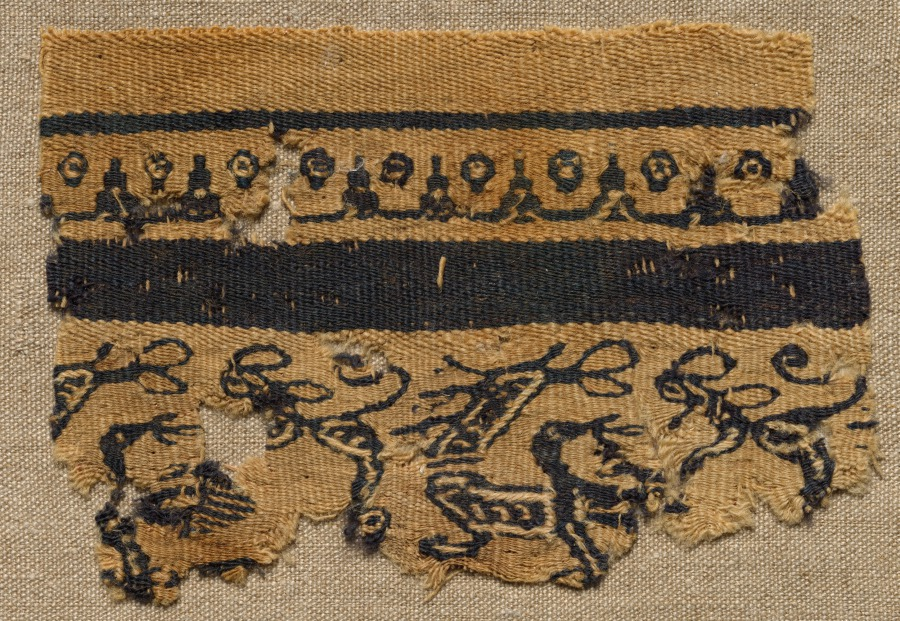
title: Fragment, with Part of a Clavus, from a Tunic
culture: Egypt, Byzantine period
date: 400s - 600s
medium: tabby ground, inwoven tapestry ornament; wool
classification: Textile